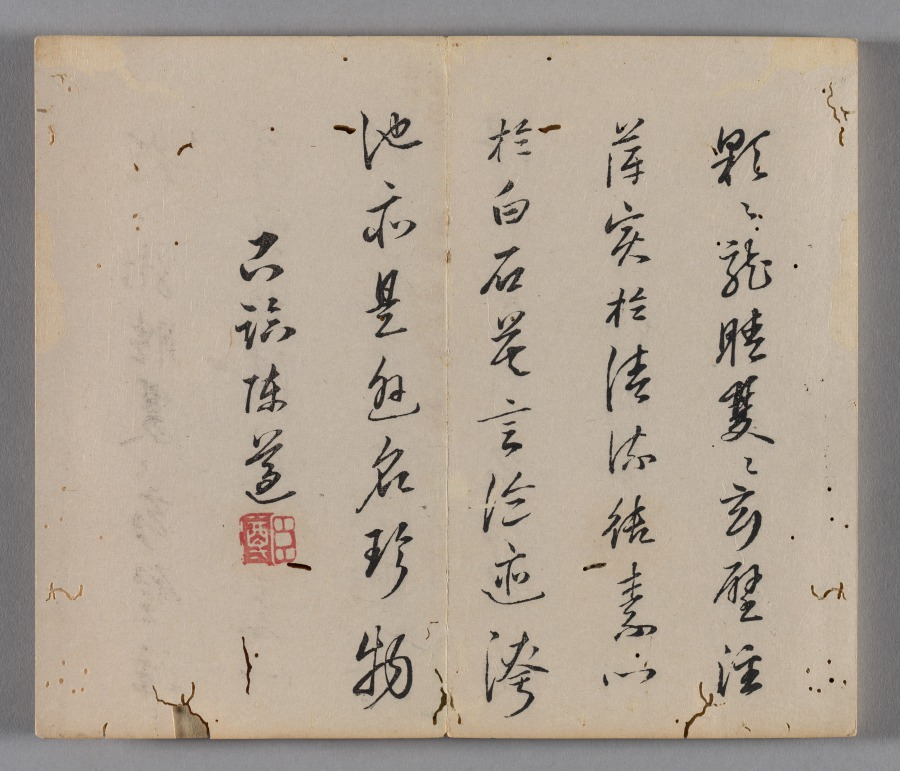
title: Ten Bamboo Studio Painting and Calligraphy Handbook (Shizhuzhai shuhua pu): Fruit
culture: China, Qing dynasty (1644-1911)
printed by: Hu Zhengyan (Chinese, c. 1584–1674)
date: 1633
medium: Woodblock-printed book; ink and colors on paper; first edition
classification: Print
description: Color printing reached a level of perfection in the early 1600s, as seen in this Ten Bamboo Studio Collection of Calligraphy and Painting and the Mustard Seed Garden Manual of Painting (printed 1679 and 1701). The painterly quality, precision in registering (aligning) the woodblocks, and harmonious colors made them the most successful color print editions in Chinese history. Both editions were printed and compiled in Nanjing, spread nationwide, and had a great impact on the arts in Japan and Korea.